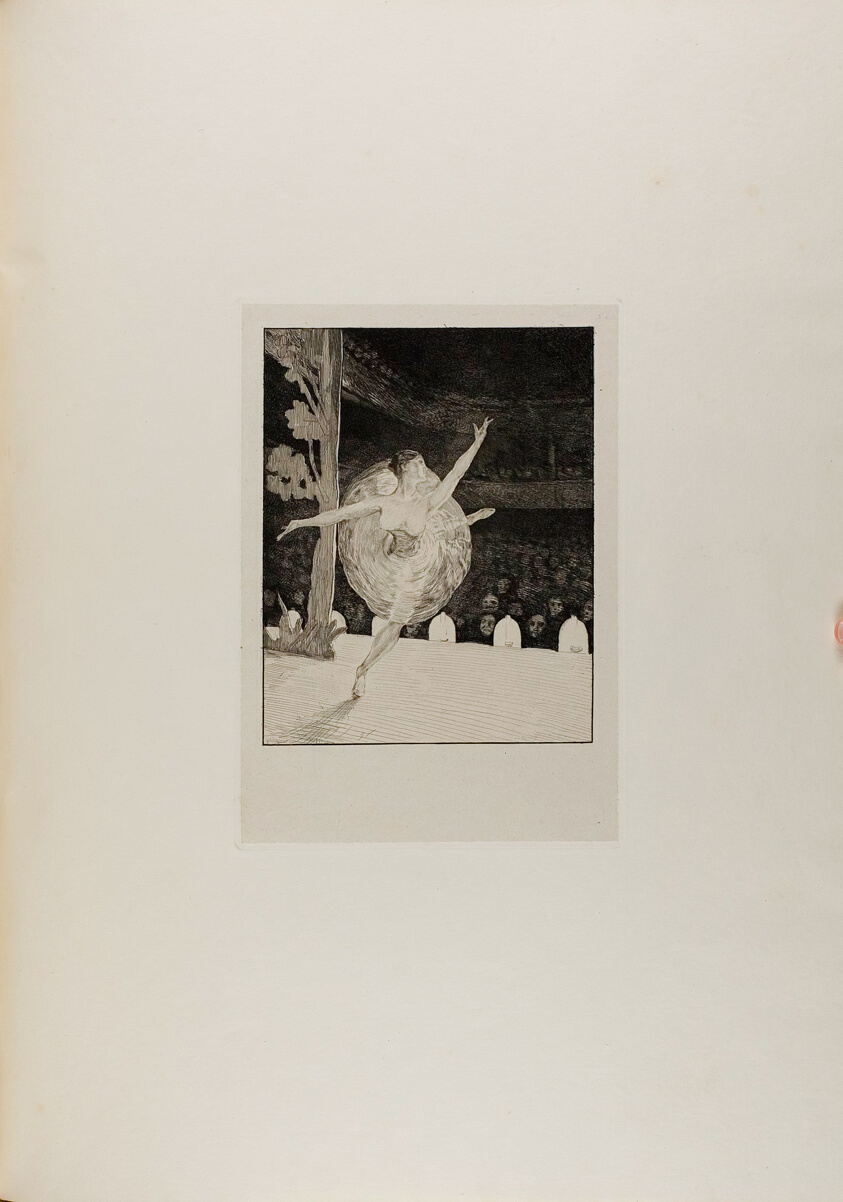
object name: Print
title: For Everyone, plate eight from A Life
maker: Max Klinger (German, 1857-1920); printed by Otto Felsing (German, 19th century)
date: 1884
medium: Etching, with drypoint on ivory China paper, laid down on cream laid paper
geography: Germany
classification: etching; print; prints and drawing